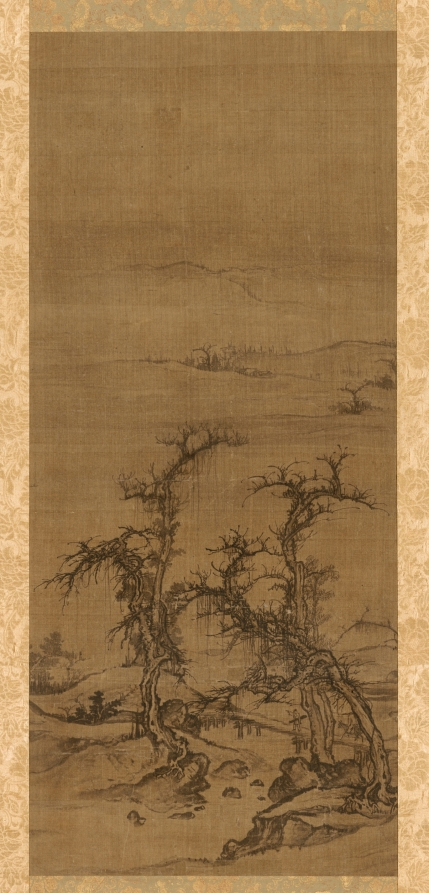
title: Carrying a Qin on a Visit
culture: China, Yuan dynasty (1271-1368)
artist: attributed to Luo Zhichuan (Chinese, active 1280s–1320s)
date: 1271–1368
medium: hanging scroll (now paneled), ink on silk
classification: Painting